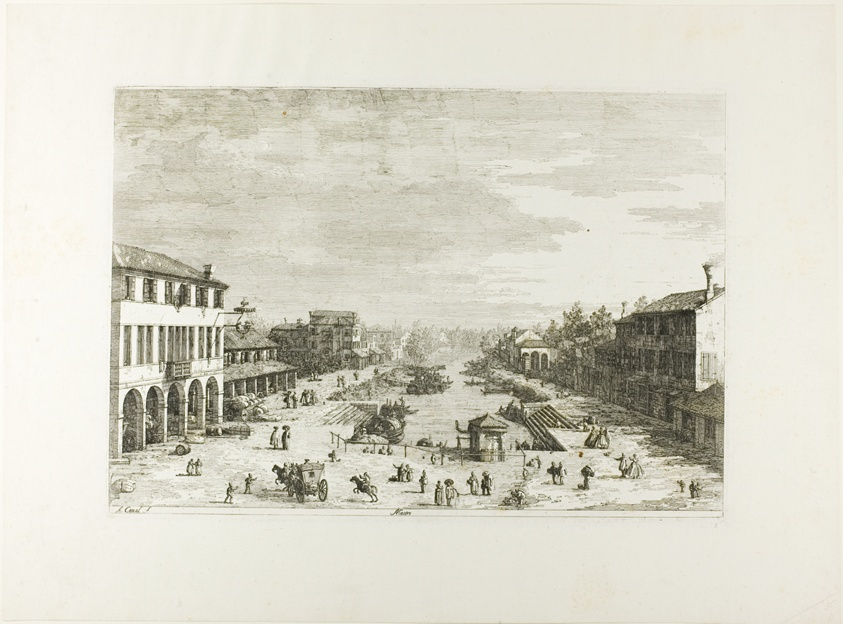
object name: Print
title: Mestre, from Vedute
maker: Canaletto (Italian, 1697-1768)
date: 1735/44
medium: Etching in black on ivory laid paper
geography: Italy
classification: etching; print; prints and drawing